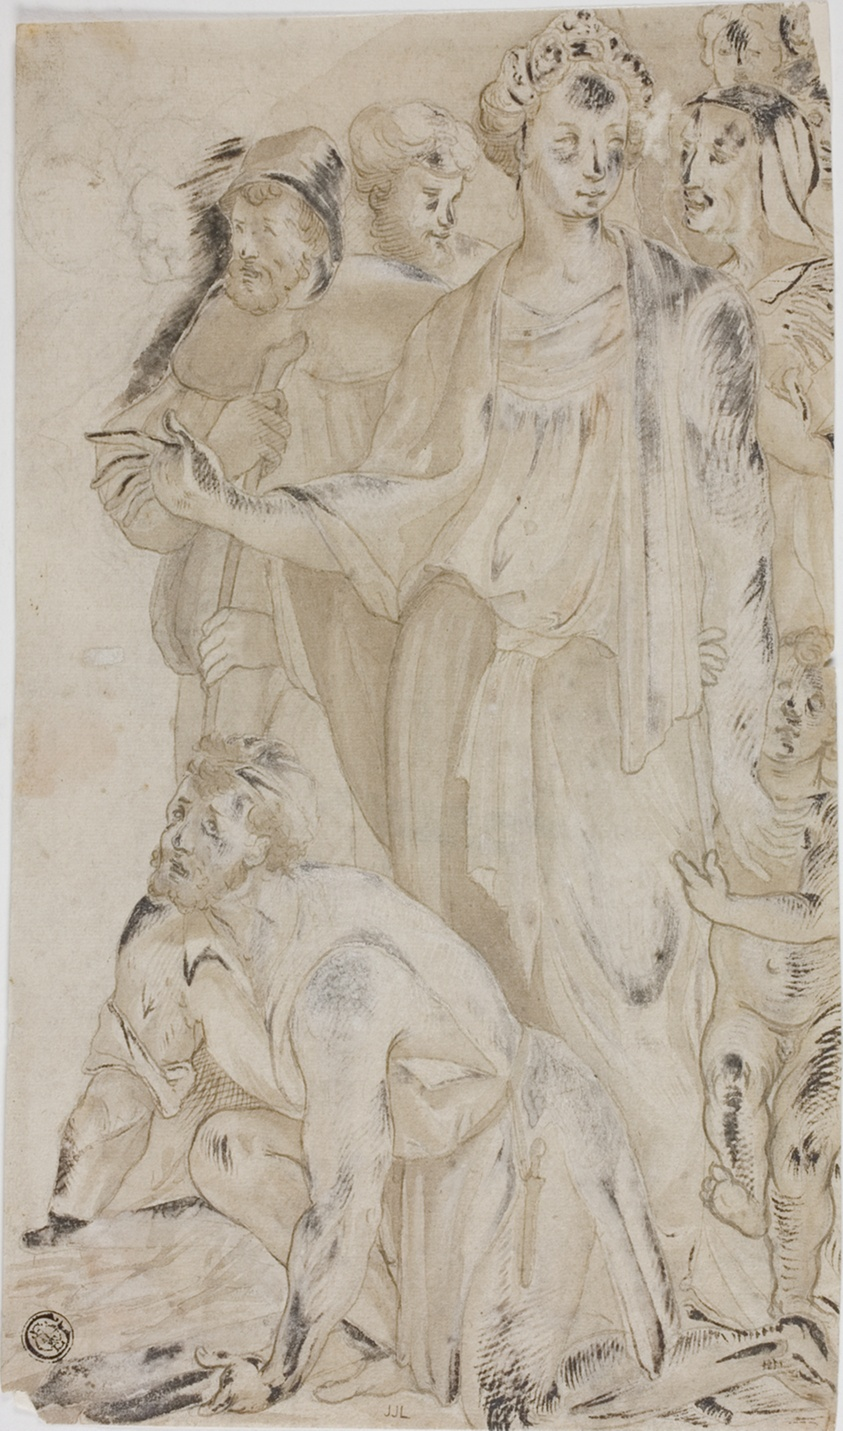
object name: Drawing and Watercolor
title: Woman and Nude Young Boy Surrounded by Figures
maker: Unknown Artist; German, 1600-1799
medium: Pen and brown ink, with brush and brown wash, heightened with lead white (discolored), over black chalk, on cream laid paper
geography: Germany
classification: ink or chalk wash; drawings (visual works); prints and drawing